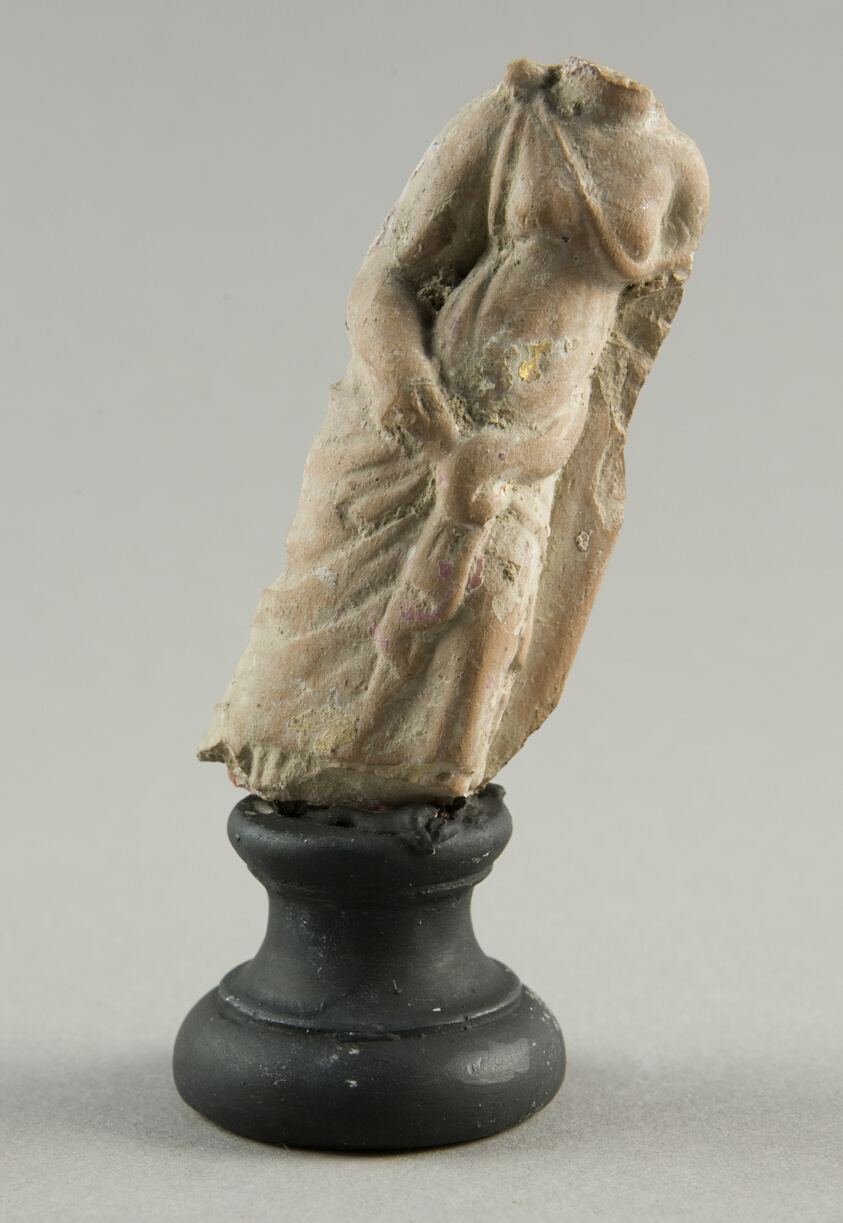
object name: Sculpture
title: Draped Torso of a Woman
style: greek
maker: Greek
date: 3rd/2nd century BCE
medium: terracotta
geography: Greece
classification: earthenware; ceramics; sculpture; ancient art